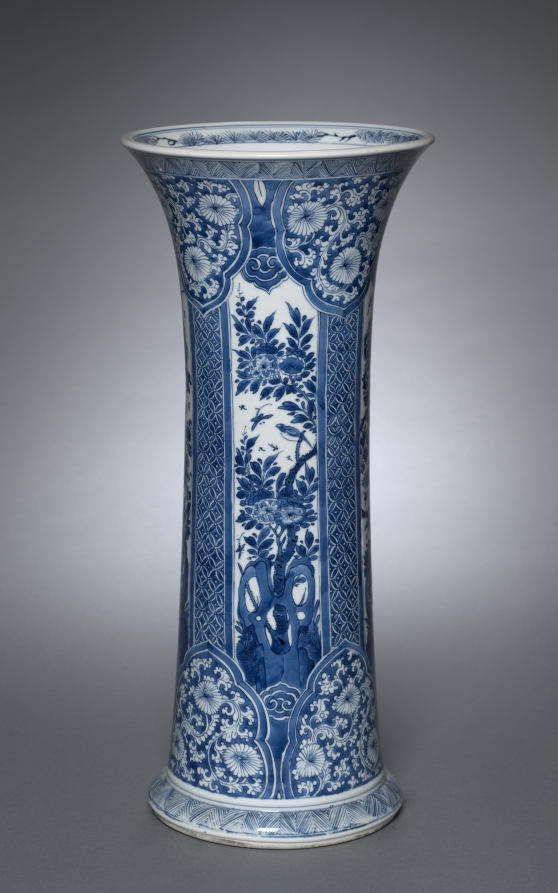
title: Vase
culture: China, Jiangxi province, Jingdezhen kilns, Qing dynasty (1644–1911), Kangxi reign (1662–1722)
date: 1662–1722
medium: porcelain with underglaze blue decoration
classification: Ceramic